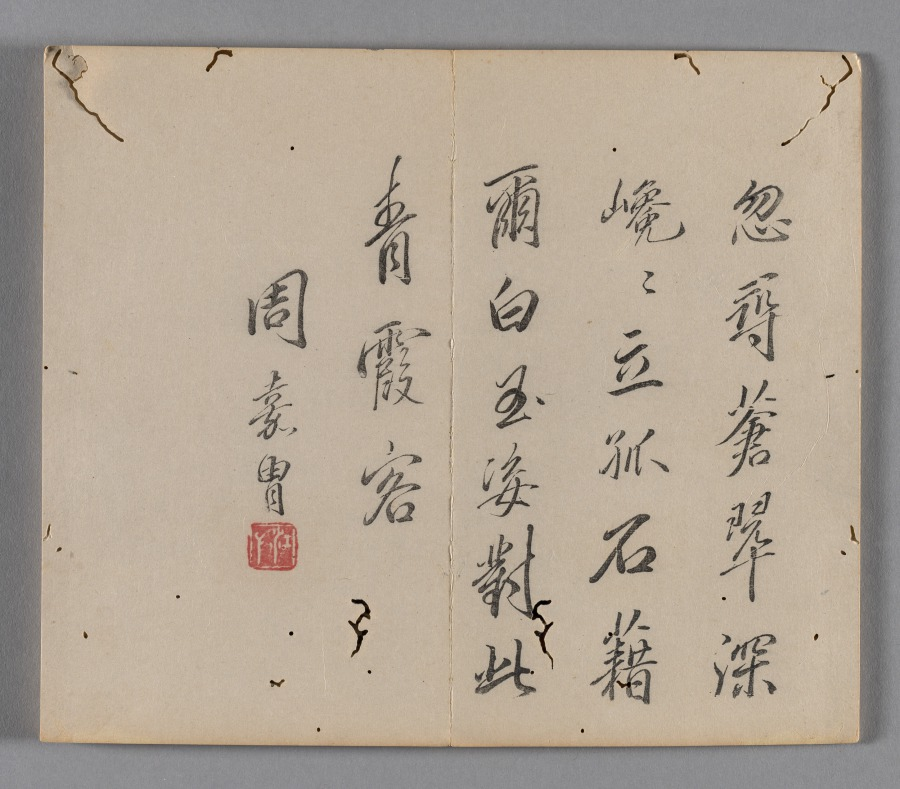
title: Ten Bamboo Studio Collection of Calligraphy and Painting: Miscellaneous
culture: China, Qing dynasty (1644-1911)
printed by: Hu Zhengyan (Chinese, c. 1584–1674)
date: 1633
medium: Woodblock-printed book; ink and colors on paper; first edition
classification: Print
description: Color printing reached a level of perfection in the early 1600s, as seen in this Ten Bamboo Studio Collection of Calligraphy and Painting and the Mustard Seed Garden Manual of Painting (printed 1679 and 1701). The painterly quality, precision in registering (aligning) the woodblocks, and harmonious colors made them the most successful color print editions in Chinese history. Both editions were printed and compiled in Nanjing, spread nationwide, and had a great impact on the arts in Japan and Korea.